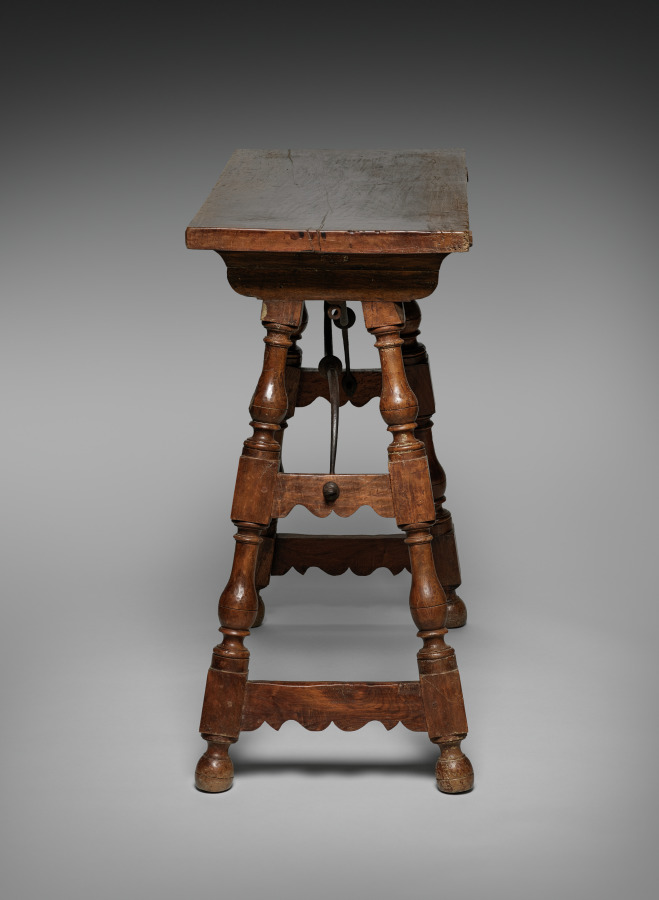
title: Chest (Base)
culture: Spain, Colonial, late 17th Century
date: late 1600s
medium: turned and joined wood with wrought iron hardware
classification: Furniture and woodwork